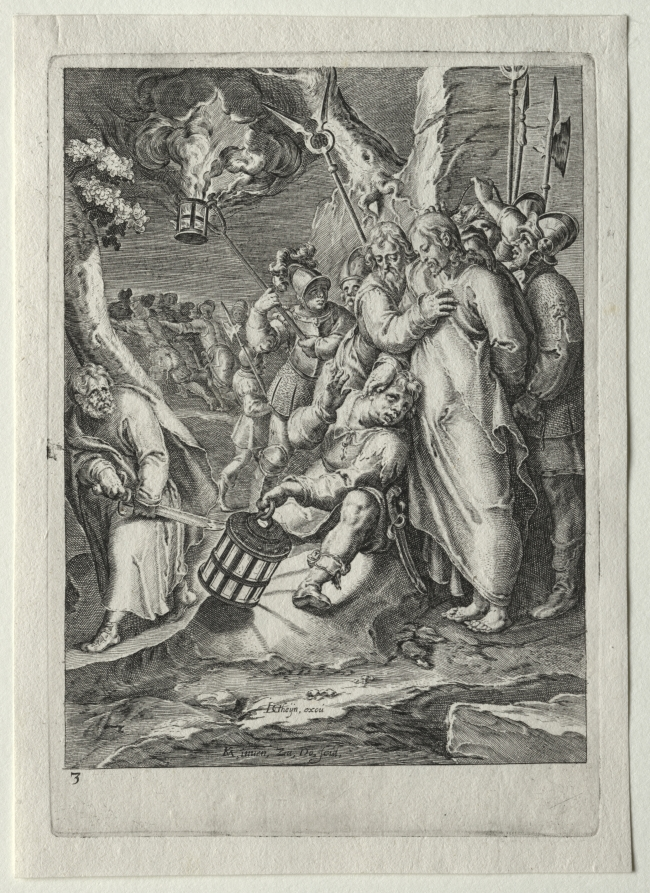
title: Passion Set: The Treason of Judas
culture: Netherlands, 16th century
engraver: Zacharias Dolendo (Dutch, 1561–1604)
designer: after Karel van Mander I (Dutch, 1548–1606)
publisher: Jacob de Gheyn II (Netherlandish, 1565–1629)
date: 1596–98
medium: engraving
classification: Print